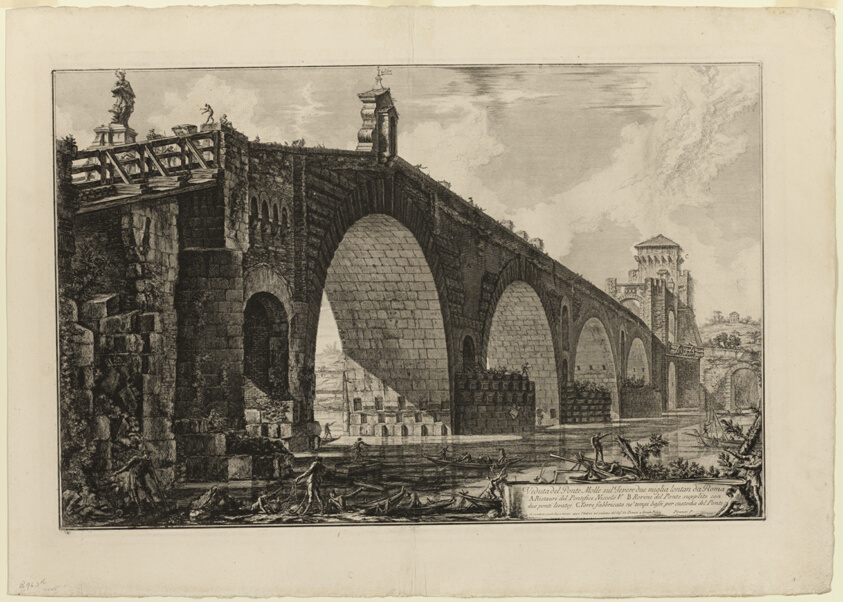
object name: Print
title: View of the Ponte Molle [or Milvian Bridge] over the Tiber two miles outside Rome, from Views of Rome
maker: Giovanni Battista Piranesi (Italian, 1720-1778)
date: 1762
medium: Etching on heavy ivory laid paper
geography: Italy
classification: etching; print; prints and drawing